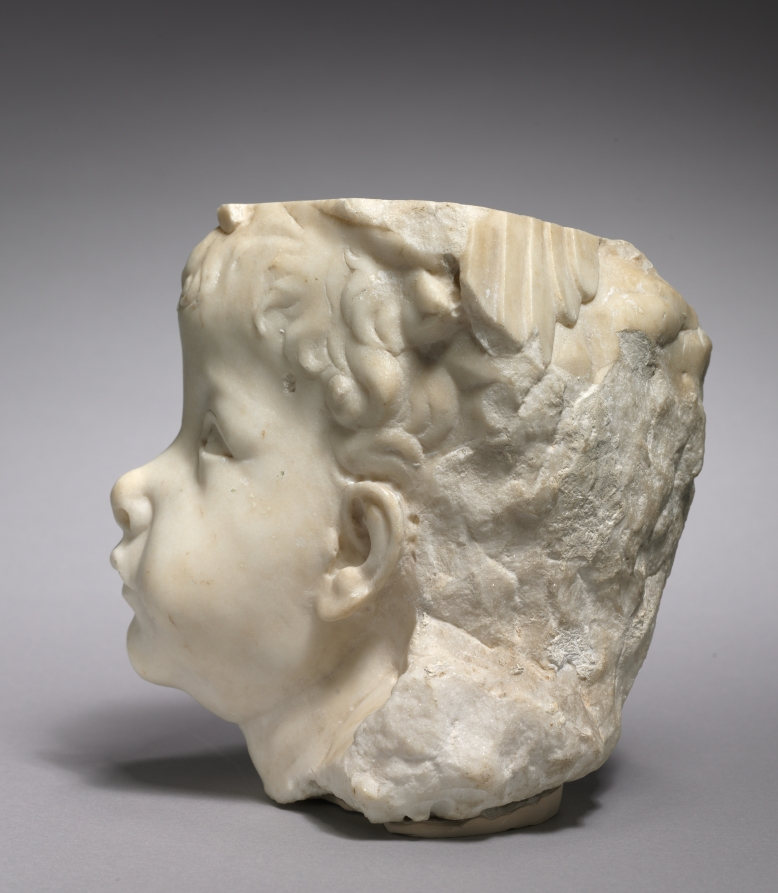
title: Head of a Putto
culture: Italy, Florence, 15th century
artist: follower of Desiderio da Settignano (Italian, 1429/32–1464)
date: 1450–1475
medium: marble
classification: Sculpture